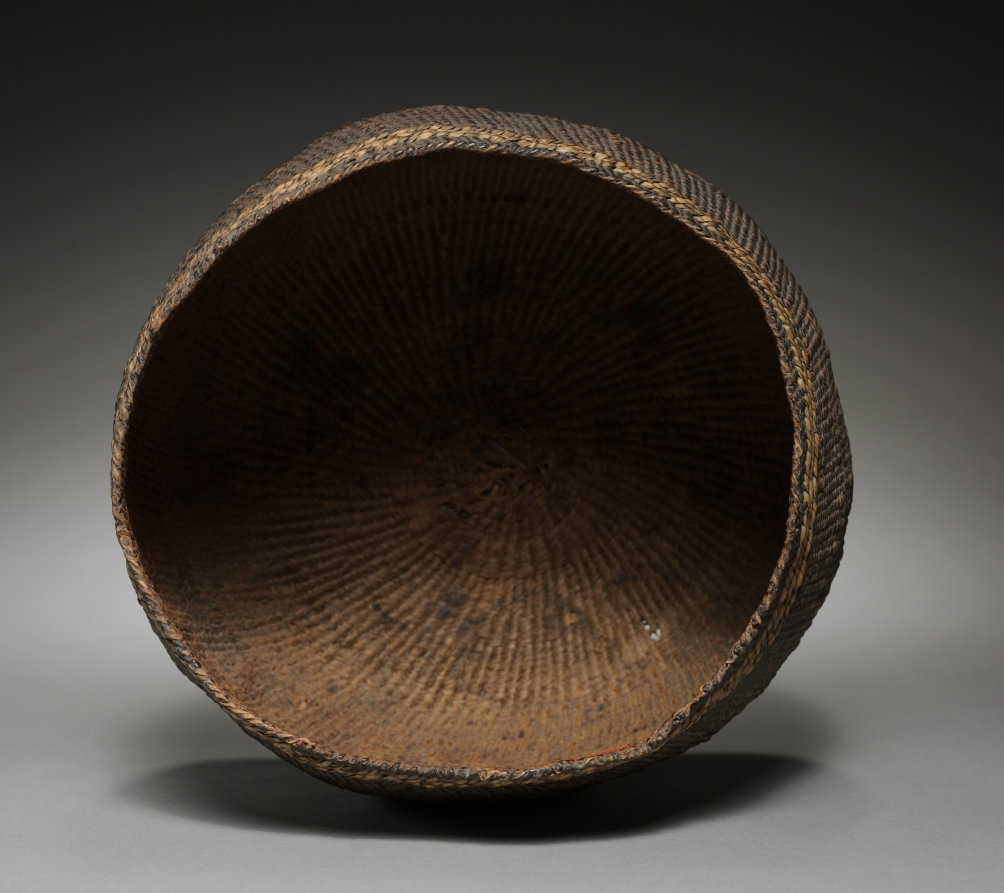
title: Cooking Bowl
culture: California (?), Native American, Unassigned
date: before 1927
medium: twined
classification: Basketry